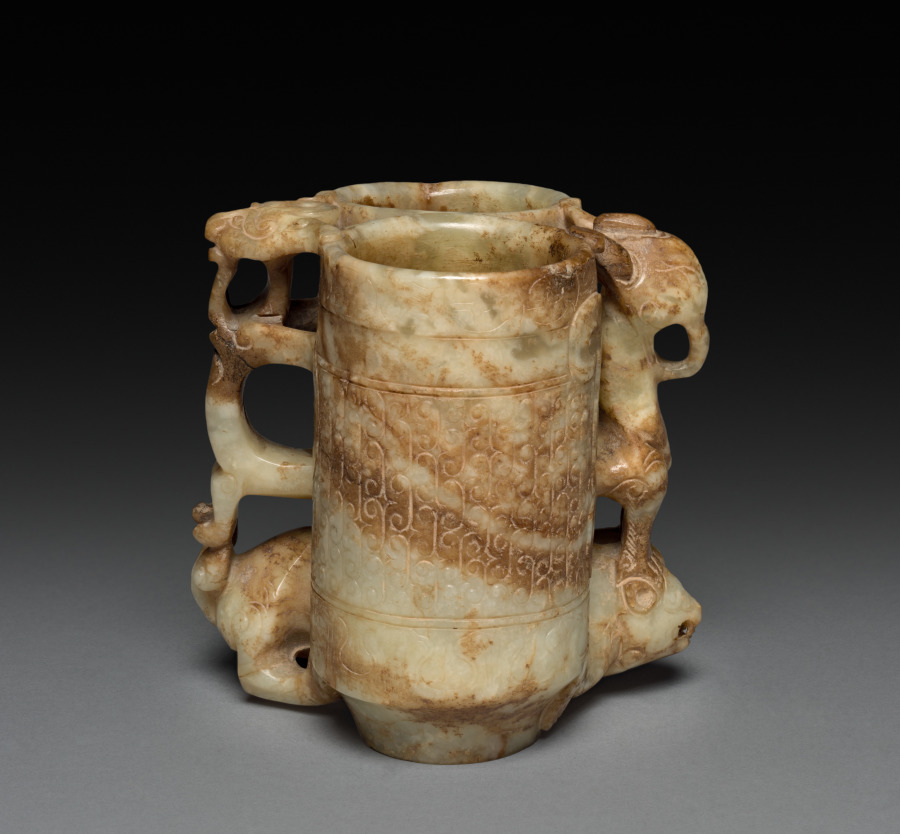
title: Champion Vase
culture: China, Song dynasty (960-1279) - Ming dynasty (1368-1644)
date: 960– 1279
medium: jade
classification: Jade